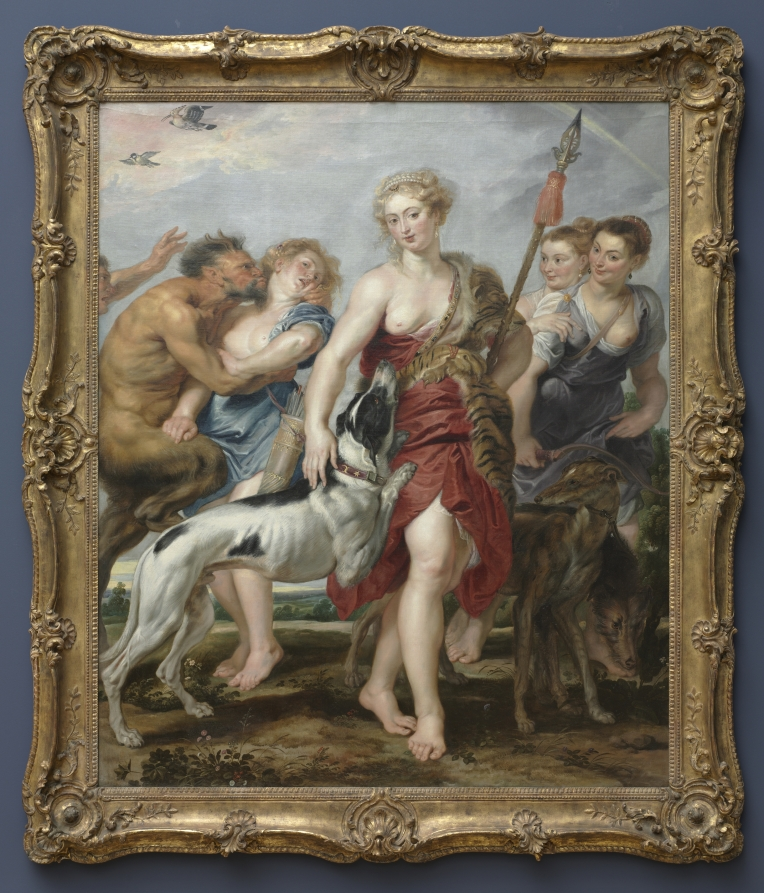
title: Diana and Her Nymphs Departing for the Hunt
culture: Flanders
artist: Peter Paul Rubens (Flemish, 1577–1640)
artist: and Workshop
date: c. 1615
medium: oil on canvas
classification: Painting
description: Diana, the Roman goddess of the hunt, wears a crescent on her forehead, also identifying her as the moon goddess. Diana lived apart from men, accompanied by a group of nymphs; she often represented unattainable beauty or chastity. With a nymph at left fending off a lustful satyr, Rubens refers to a struggle between vice and virtue, combining a sensual display of female bodies with a moral undertone. To bring the viewer more fully into the narrative, Rubens pulls the full-bodied figures to the front of the picture plane, and Diana steps forward, activating the space between viewer and subject. The nymph at the right has the features of Isabella Brant, the artist’s wife, and can be compared with Rubens’s portrait of her, also in the museum's collection.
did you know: The moon and stars on the white and black dog’s collar indicate that both hounds are companions of Diana, accompanying the goddess on her hunts.